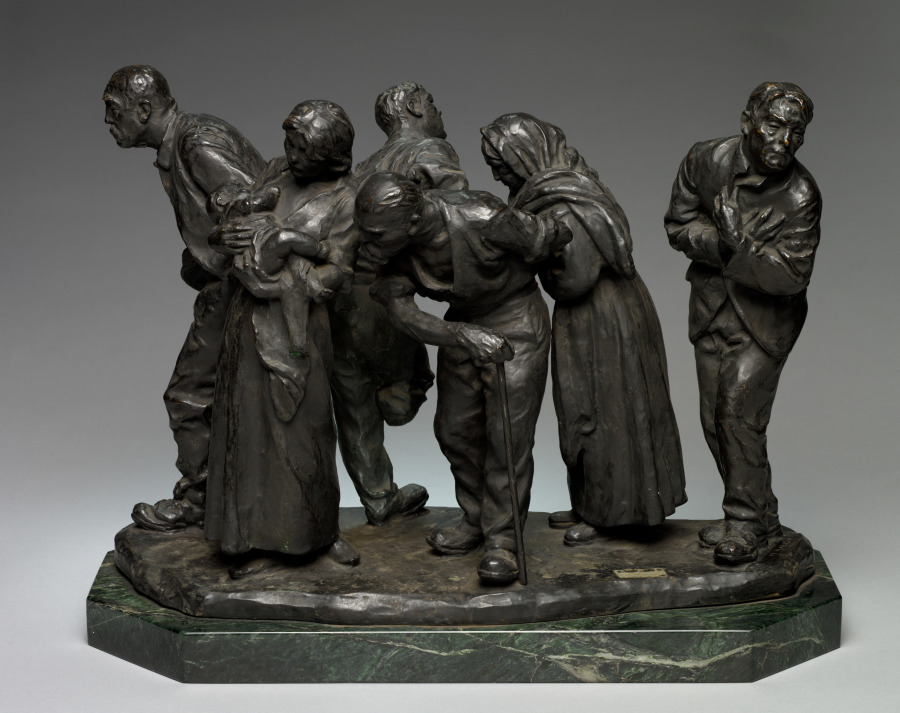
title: The Bread Line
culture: America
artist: Max Kalish (American, born Russian Empire [now Lithuania], 1891–1945)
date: 1926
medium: bronze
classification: Sculpture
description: Sculptor Max Kalish described his motivation behind creating The Bread Line: "My interest in making this group came to me gradually through years of concern with the question of unemployment and poverty." The sculpture's six figures were modeled separately, then arranged together to make the final composition.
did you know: The artist is buried in Mayfield Cemetery, Cleveland.